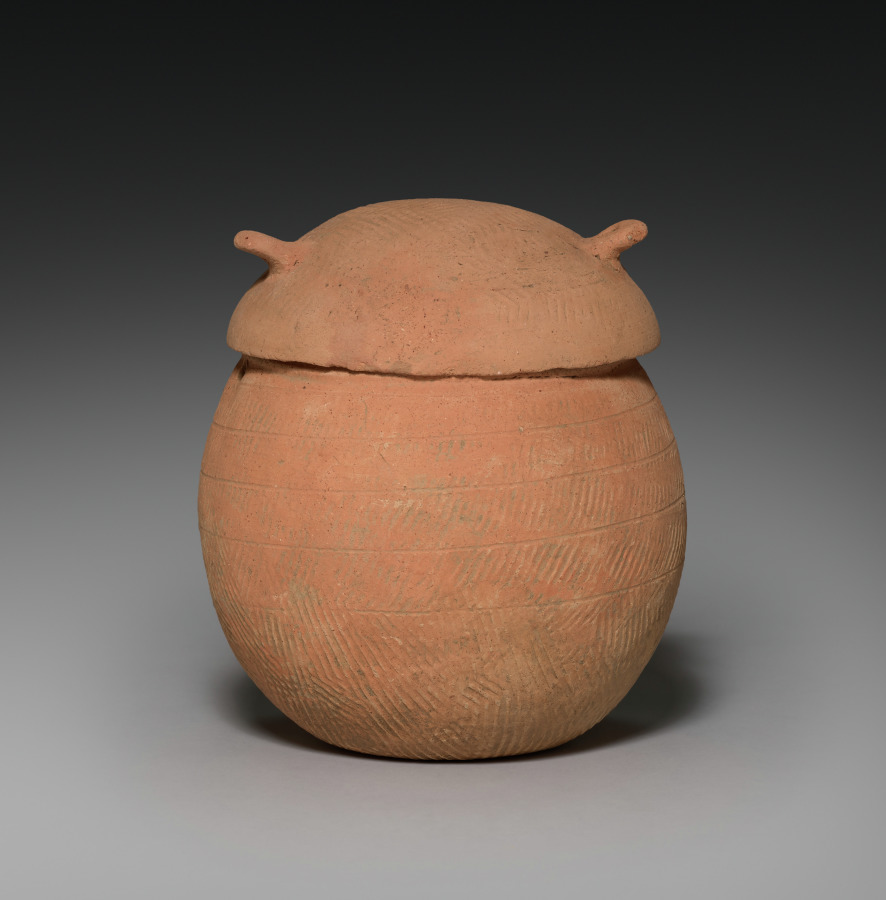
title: Lidded Vessel with Loop Handles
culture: Korea, Three Kingdoms period (57 BCE–668 CE)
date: 57 BCE–668 CE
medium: earthenware, with impressed, paddled, and incised decoration and red slip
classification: Ceramic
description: This small storage jar was hand built from coils of clay before it was finished on a potter's wheel. The thick, vertical ridges covering the surface were impressed into the wet clay using a carved wooden paddle. This network of raised lines was then intersected by four incised lines coursing around the bulbous form and separating the body into lower and upper areas with deft visual simplicity. Such direct, effective design solutions to ceramic decoration appear frequently in early Korean ceramics. The two perforations in the upper body were no doubt used to help secure the lid to the body with cord.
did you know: Closed kilns built on hills became widely used for producing this type of pottery vessel in Korea during the Three Kingdoms period.